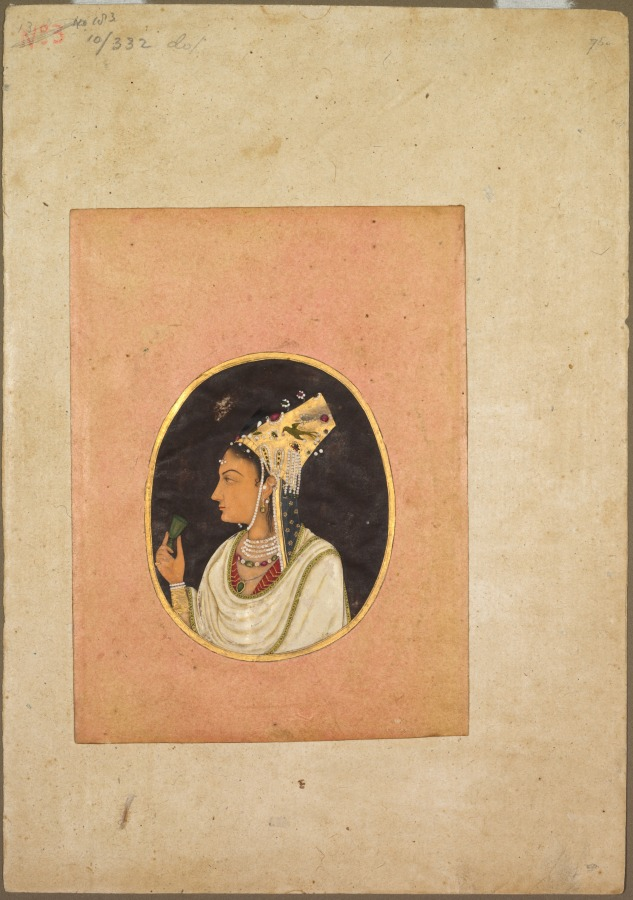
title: Oval portrait of a woman in a Chaghtai hat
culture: India, Mughal, 18th century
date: c. 1740–50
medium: Gum tempera and gold on paper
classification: Painting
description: The tall, flat-topped hat is an element of the native dress of the Mughals from eastern Uzbekistan. Of mixed Turkic and Mongol ethnicities, they spoke a Turkic language known as Chaghatai. Chaghatai refers to the name of the son of the Mongol Chingiz (Genghis) Khan, who ruled this area of Central Asia from 1246 to 1282. This woman’s hat has been studded with jewels and strings of pearls. The portrait jewel format that was once reserved for the emperor has now been expanded to include ladies of the court. The woman holds a jade wine cup and wears a draped upper garment with a woven or embroidered border similar to the fragment on display at the left.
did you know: She holds a delicate jade cup of the type for which the Mughals were famous.